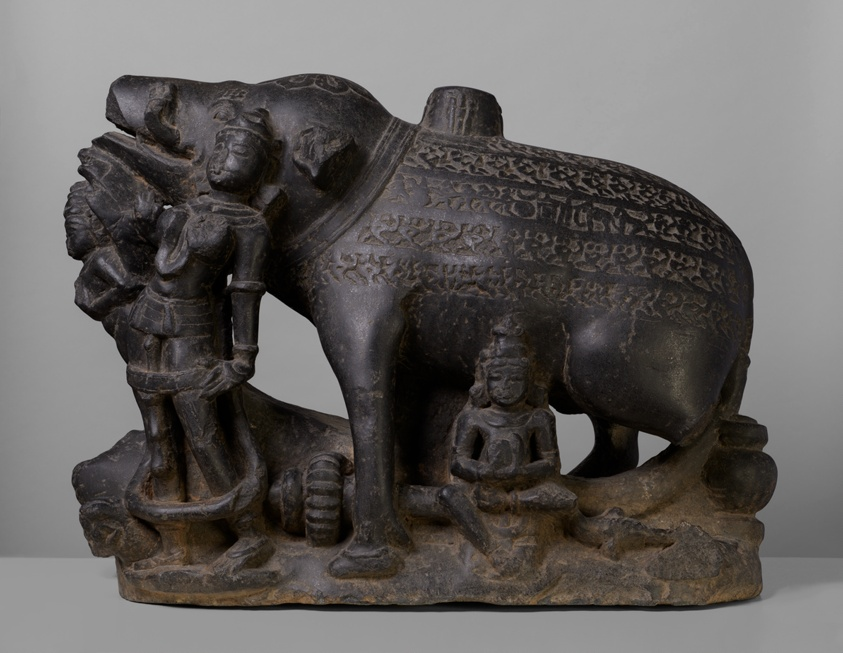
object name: Sculpture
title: Boar Incarnation of God Vishnu (Varaha)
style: South Asian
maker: India; Madhya Pradesh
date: c. 10th century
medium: Phyllite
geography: Madhya Pradesh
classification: stone; sculpture; asian art